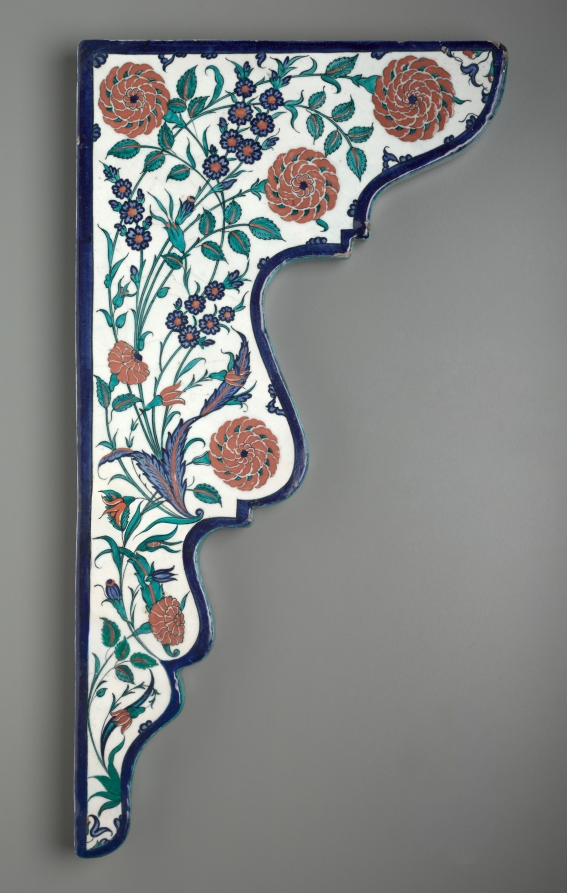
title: Tile Spandrel with Floral Sprays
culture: Turkey, Iznik, Ottoman period (1299–1922)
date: c. 1570–75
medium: Fritware with red slip and underglaze design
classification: Ceramic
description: This spandrel, along with its missing right half, would have formed a decorative archway over a niche, window, or door. It reveals the artistic and technical height achieved in Iznik, a town in northwest Turkey. Craftspeople from Iznik were renowned for their production of brilliantly colored tiles for the Ottoman sultans, rulers of one of the most powerful empires in history. The intense red on this spandrel was a technical triumph achieved with a thick iron-rich clay slip. Here, it forms red roses intertwined with leaves and other blossoms.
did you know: The tile's radiant floral sprays evoke eternal spring and visions of paradise.